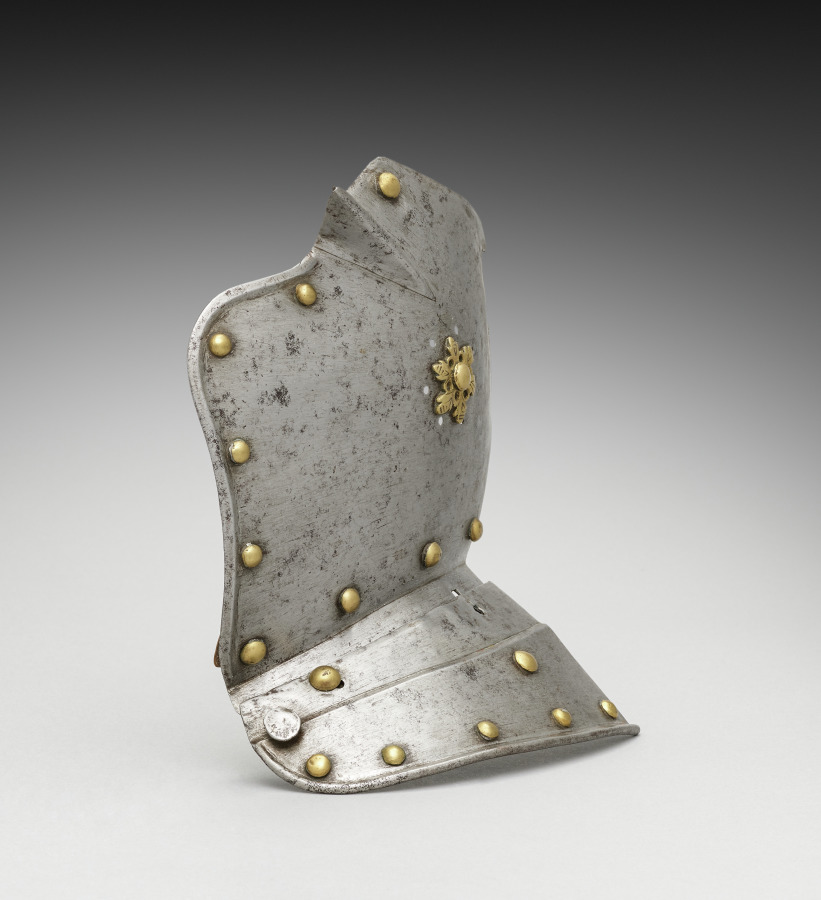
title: Ear Piece of a Helmet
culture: Germany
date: 1500s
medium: steel, brass headed rivets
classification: Arms and Armor